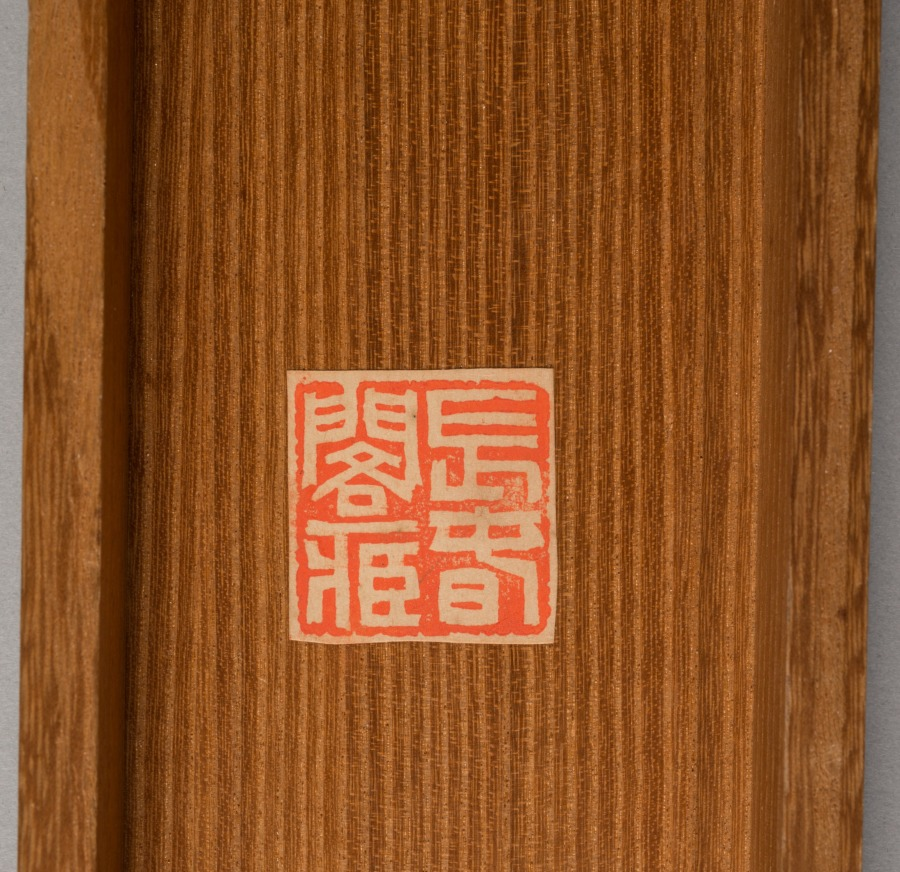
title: Monju with Five Hair Knots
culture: Japan, Kamakura period (1185–1333)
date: late 1200s–early 1300s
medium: Hanging scroll; ink, color, gold, and cut gold on silk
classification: Painting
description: This Buddhist painting shows Monju, Manjushri in Sanskrit, riding a lion. Monju is a bodhisattva, a being who, though enlightened, chooses not to become a Buddha but instead helps others achieve enlightenment. Monju’s youthfulness symbolizes his pure wisdom, unsullied by the world, and his five hair knots represent his vow to keep calamity at bay. The supernatural nature of his lion is emphasized by its hair, every strand painted in gold, as well as by the lotus platforms beneath each of its feet. The boy’s bejeweled body and silk finery is meant to resemble that of an Indian prince.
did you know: This painting is exemplary of the Kamakura period, known for artworks with special attention paid to the realism of images.